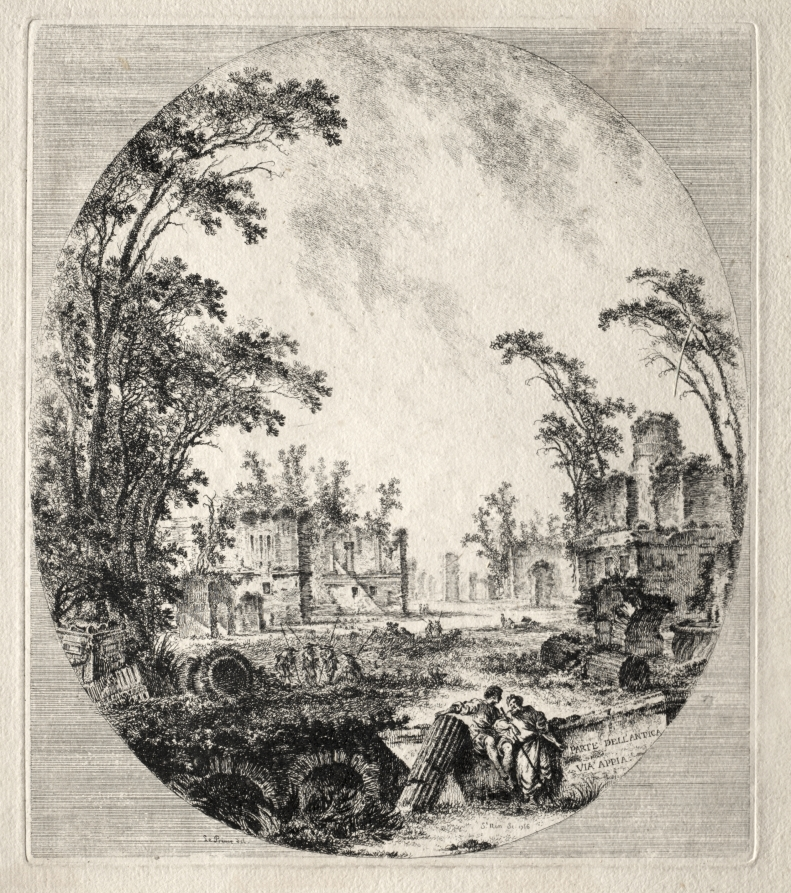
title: Part of the Old Appian Way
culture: France, 18th century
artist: Jean-Claude-Richard de Saint-Non (French, 1727–1791)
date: 1756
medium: etching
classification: Print